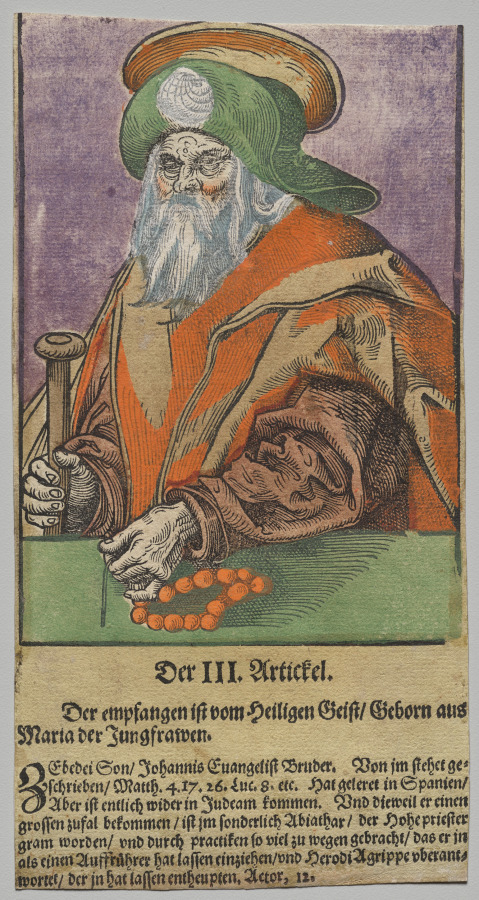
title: James the Greater from Christ, the Apostles, and Saint Paul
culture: Germany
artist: Lucas Cranach the Elder, After (German, 1472–1553)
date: 1563/64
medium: Woodcut with letterpress text, hand colored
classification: Print